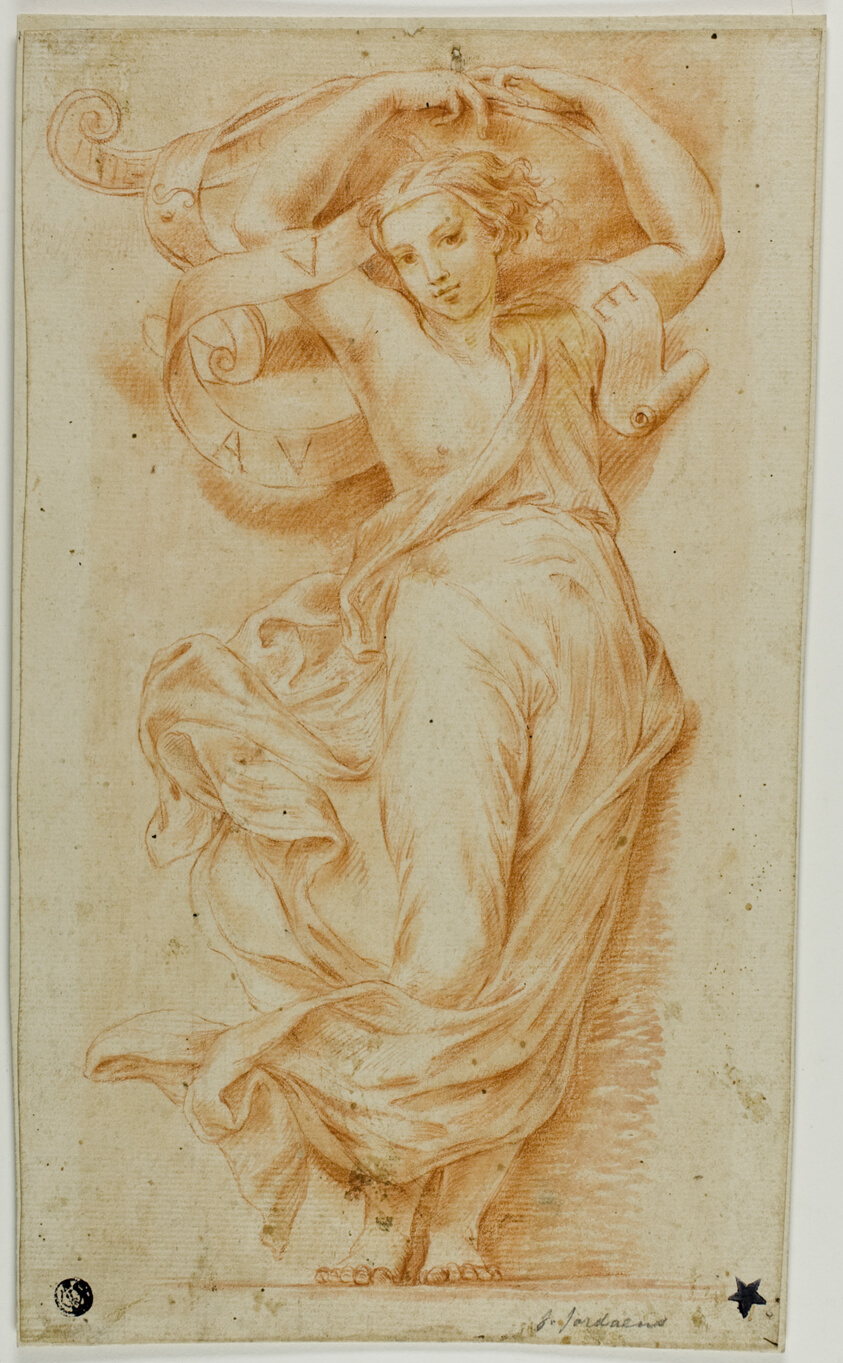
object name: Drawing and Watercolor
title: Caryatid with Yoke and Scroll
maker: After Raffaello Sanzio, called Raphael, and his workshop; Italian, 1483-1520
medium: Red chalk, with brush and red chalk wash, on ivory laid paper, laid down on card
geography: Italy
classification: chalk; drawings (visual works); prints and drawing